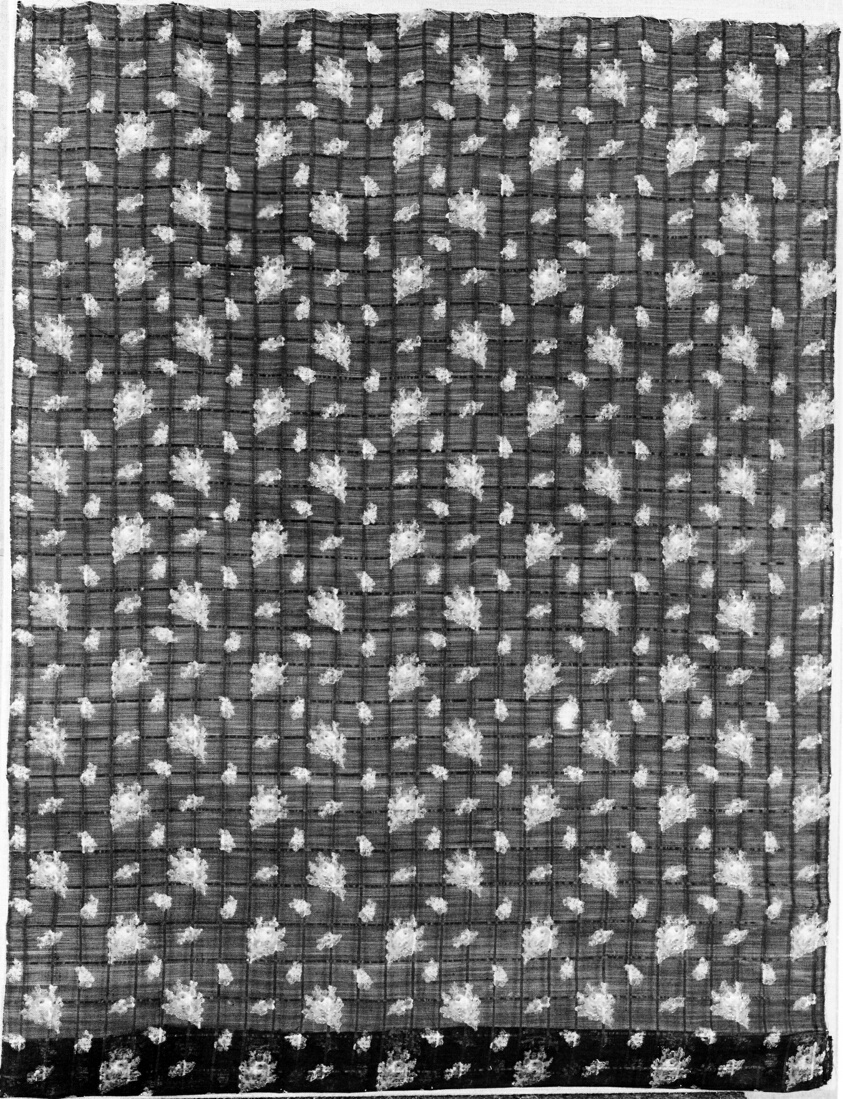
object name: Textile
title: Three Panels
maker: France or United States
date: 1975/1900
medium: Wool, plain weave with stripe in satin and weft-faced plain weave printed and painted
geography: France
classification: textile; weaving - printed